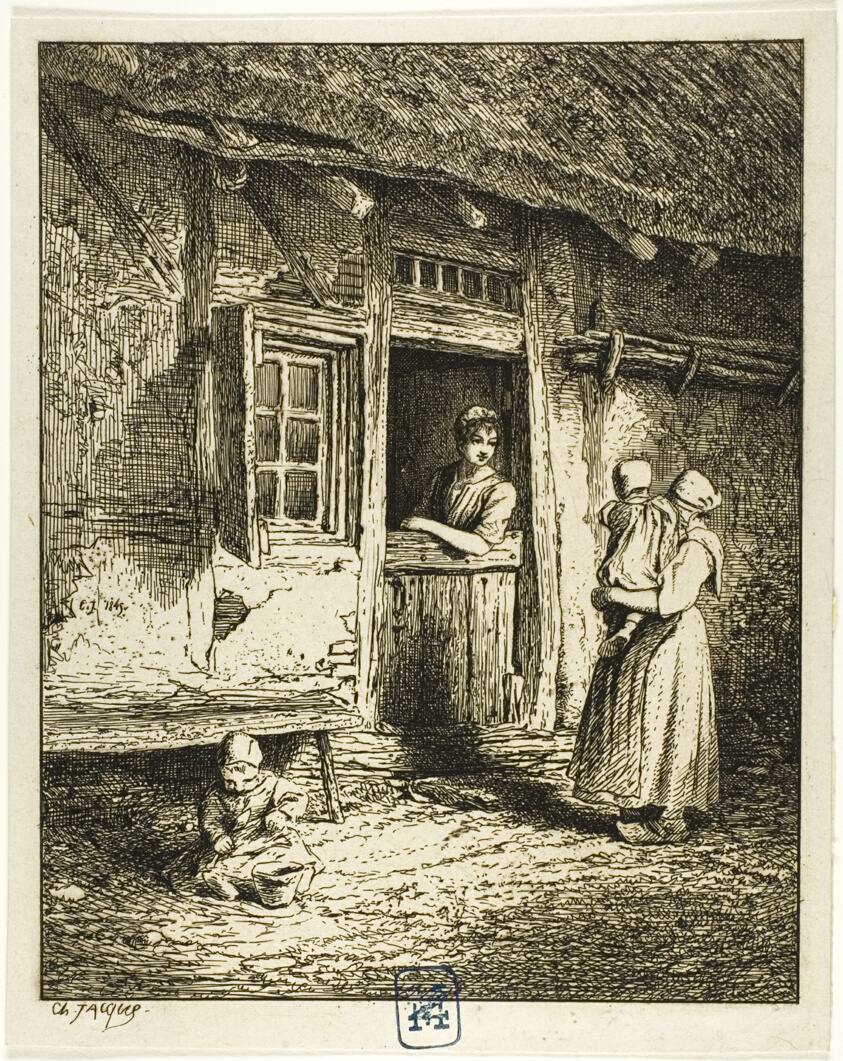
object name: Print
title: Entrance to a Peasant's House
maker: Charles Émile Jacque (French, 1813-1894)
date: 1845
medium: Etching and engraving on ivory wove paper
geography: France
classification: etching; print; prints and drawing